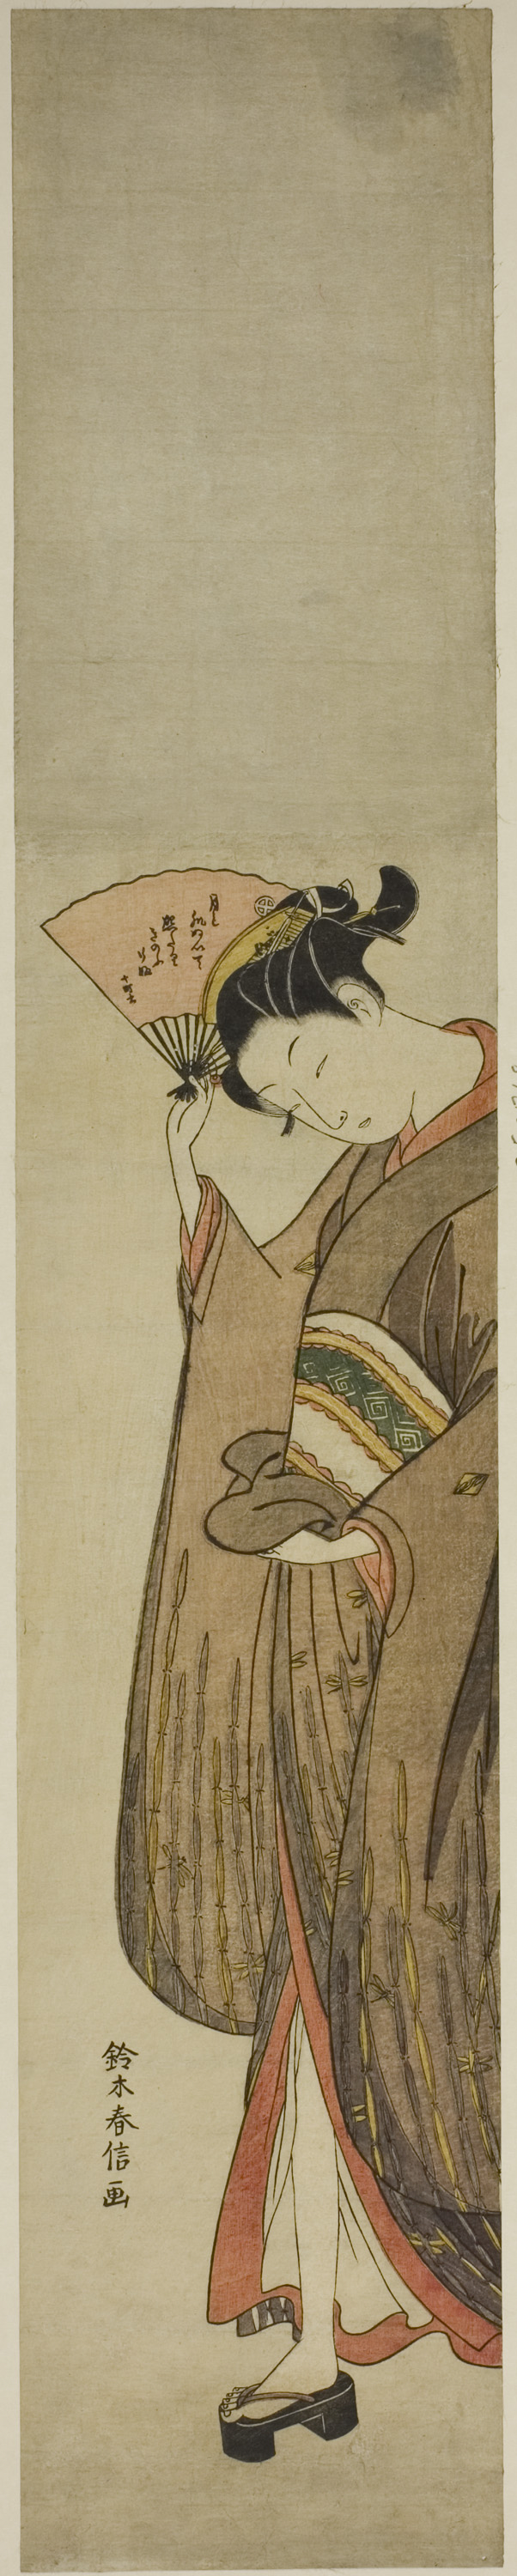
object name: Print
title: Young Woman Holding a Fan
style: Japanese (culture or style)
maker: Suzuki Harunobu 鈴木 春信; Japanese, 1725 (?)-1770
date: c. 1769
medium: Color woodblock print; hashira-e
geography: Japan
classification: woodblock print; print; asian art